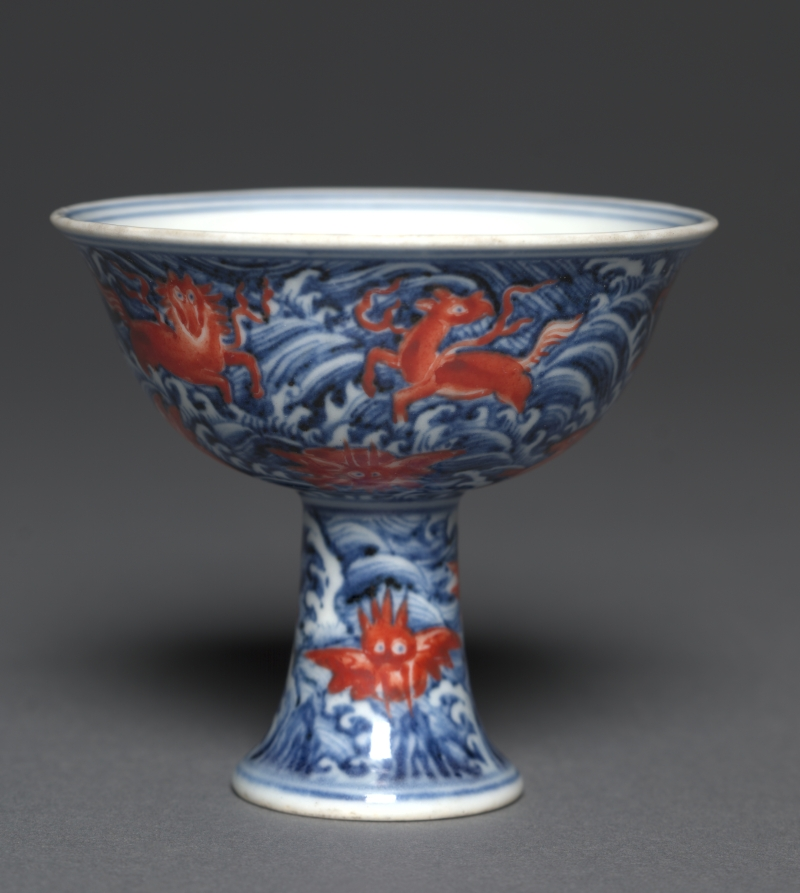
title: Stem Cup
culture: China, Jiangxi Province, Jingdezhen, Ming dynasty (1368–1644), Xuande mark and period (1426–35)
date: 1426–35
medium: porcelain with underglaze blue and overglaze red enamel decoration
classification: Ceramic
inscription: 大明宣德年製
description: These two Ming imperial wares [CMA 1957.60 and CMA 1957.61] are among the smallest, but most precious, of the museum's holdings in Chinese ceramics. The luminous glaze, gestural freedom, and vibrant color are perfectly unified to fit the delicate shapes of these luxury items.